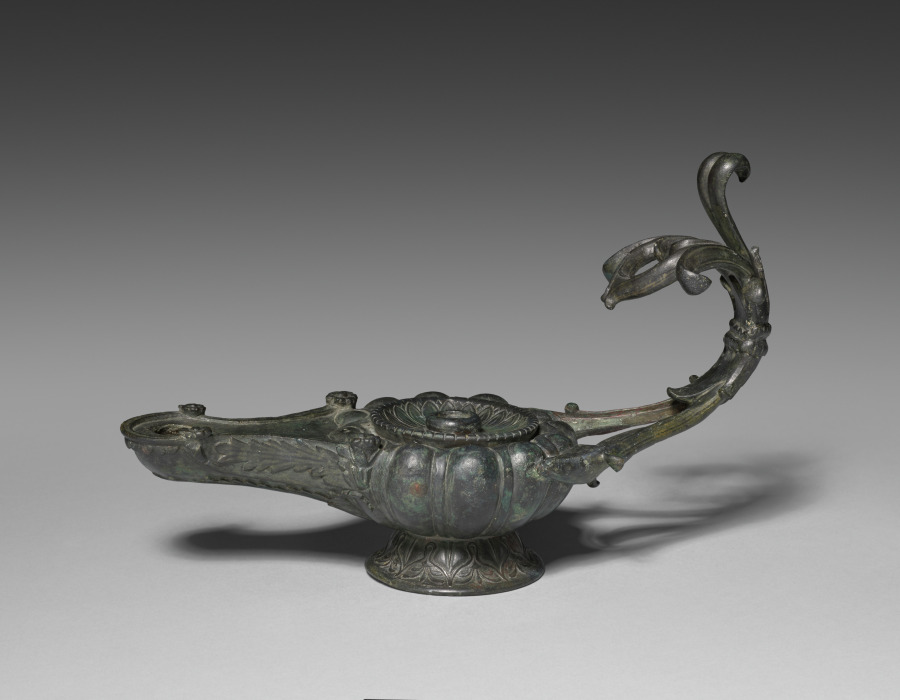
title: Oil Lamp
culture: Roman, late Republican-early Imperial (c. 50 BCE – 50 CE)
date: c. 50 BCE–50 CE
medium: Bronze, cast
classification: Metalwork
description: This large and ornate cast bronze oil lamp features a central hole for filling and a single spout for its wick. Its extravagant handle rises to create both a loop and a sort of hook, one or both of which may have served to suspend the lamp when lit. Alternatively, the lamp may have stood on its own, perhaps atop a tall lampstand. While its primary function may have been for lighting dark spaces, this lamp must also have served an ornamental purpose.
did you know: When used, this lamp likely hung from the ceiling or stood on a tall lampstand.